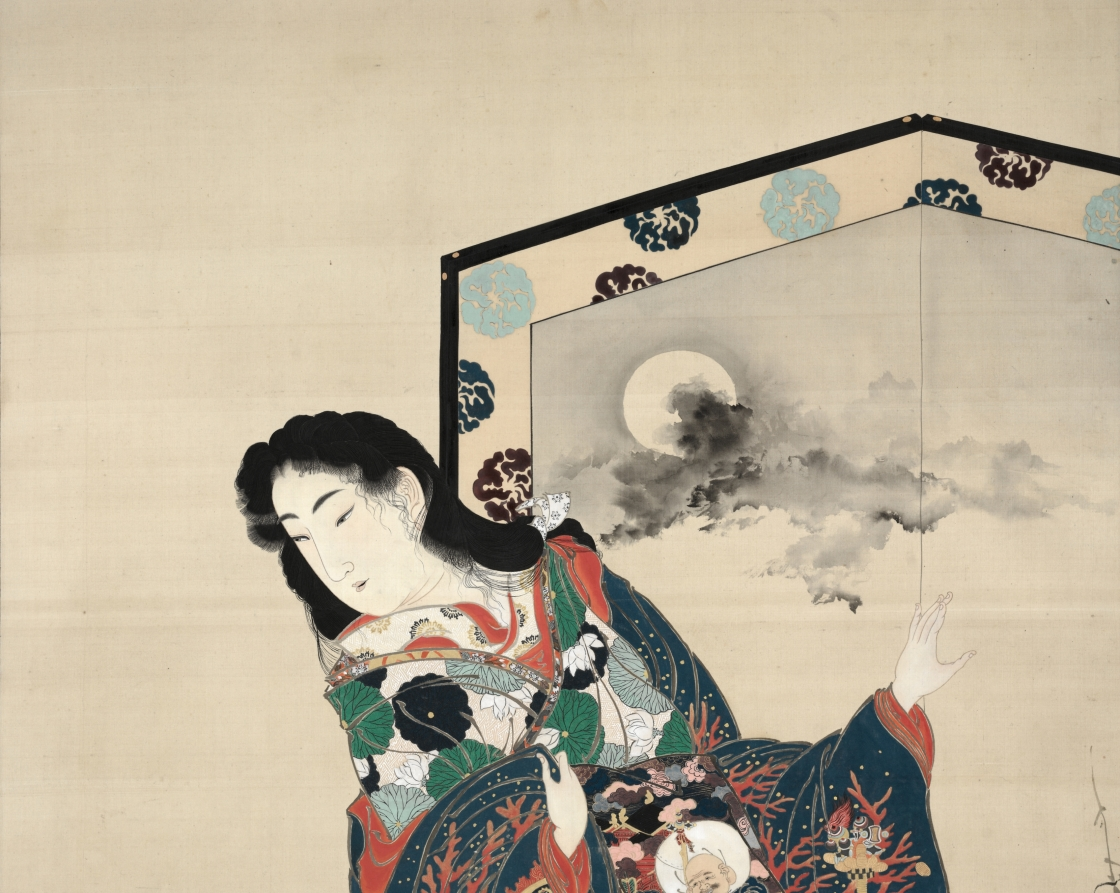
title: Hell Courtesan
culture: Japan, Meiji period (1868–1912)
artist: Kawanabe Kyōsai (Japanese, 1831–1889)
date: 1871–89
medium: Hanging scroll; ink, color, gold, and silver on silk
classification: Painting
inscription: artist's signature and two seals, lower right.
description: Kawanabe Kyōsai repeated this large-scale composition with variations a number of times. In this version, a famous 15th-century courtesan known for wearing a robe with images of the Buddhist hells stands before a folding screen. Legend has it that she was abducted by bandits, and wore the garment to symbolize her belief that her suffering in her current life was punishment for sins committed in a former life. Here, in a parody depiction of the garment, the courtesan stands in for Benzaiten, the goddess of everything that flows, while the remaining members of the Seven Gods of Good Fortune appear on her outer robe. One of them reports sins to Enma, the King of Hell, who is writing out his judgments on the recently deceased.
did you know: The word for longevity appears multiple times in gold and silver on her outer robe.